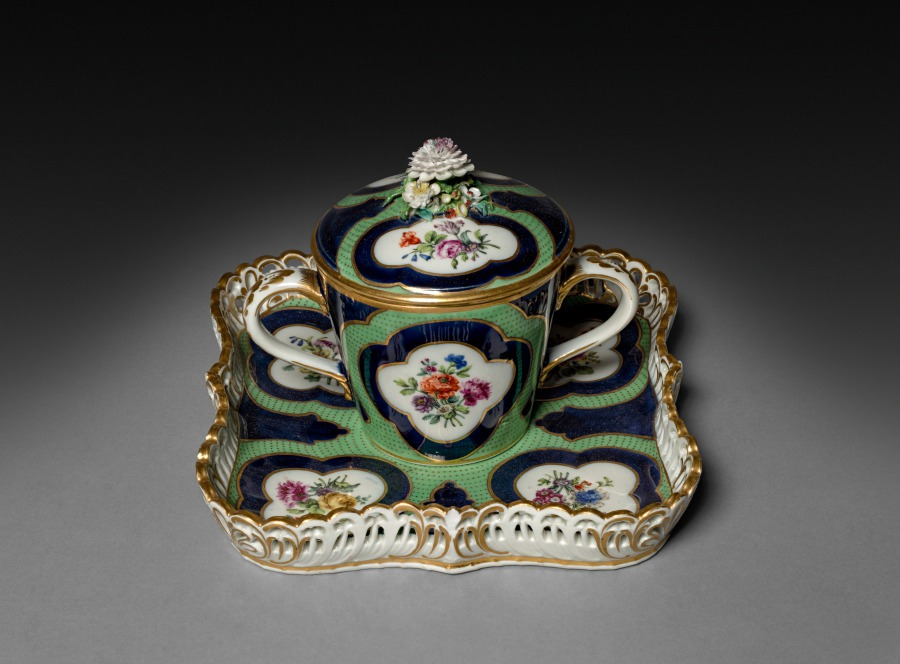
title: Two-Handled Covered Cup and Stand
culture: Austria, Vienna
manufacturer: Du Paquier Porcelain Manufactory (Austrian, active 1719–1864)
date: c. 1780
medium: porcelain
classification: Ceramic